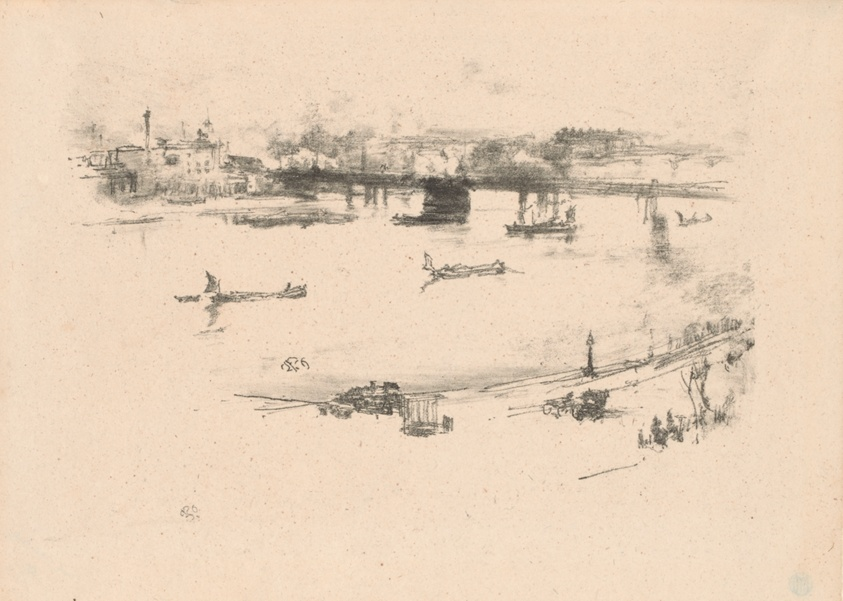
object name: Print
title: Charing Cross Railway Bridge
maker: James McNeill Whistler (American, 1834-1903)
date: 1896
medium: Transfer lithograph in black with stumping, scraping, and incising, on cream laid paper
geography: United States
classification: transfer lithograph; lithograph; print; prints and drawing; paper